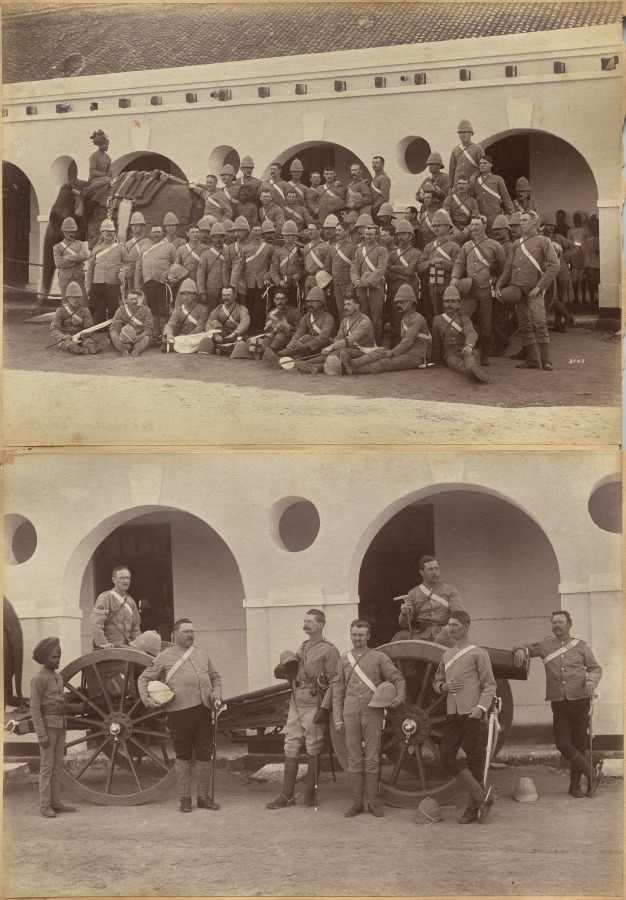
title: Officers of Elephant Battery, Jhansi (recto); Men of Elephant Battery, Jhansi (verso)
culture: India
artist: Raja Deen Dayal (Indian, 1844–1905)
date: c. 1882–87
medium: albumen print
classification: Photograph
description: These photographs are part of an album, now disassembled, of around 105 photographs taken in India between 1885 and summer 1887 that provide glimpses into the lives of the British colonial elite and royal and upper-class Indians. The museum holds another group of 37 pictures from this album (2016.266), which was probably commissioned by a British civil servant visiting or working in India around 1888 as a personal souvenir of his experiences there.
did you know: Raja Deen Dayal is regarded now, and was considered during his lifetime, to be India’s most important 19th-century photographer.